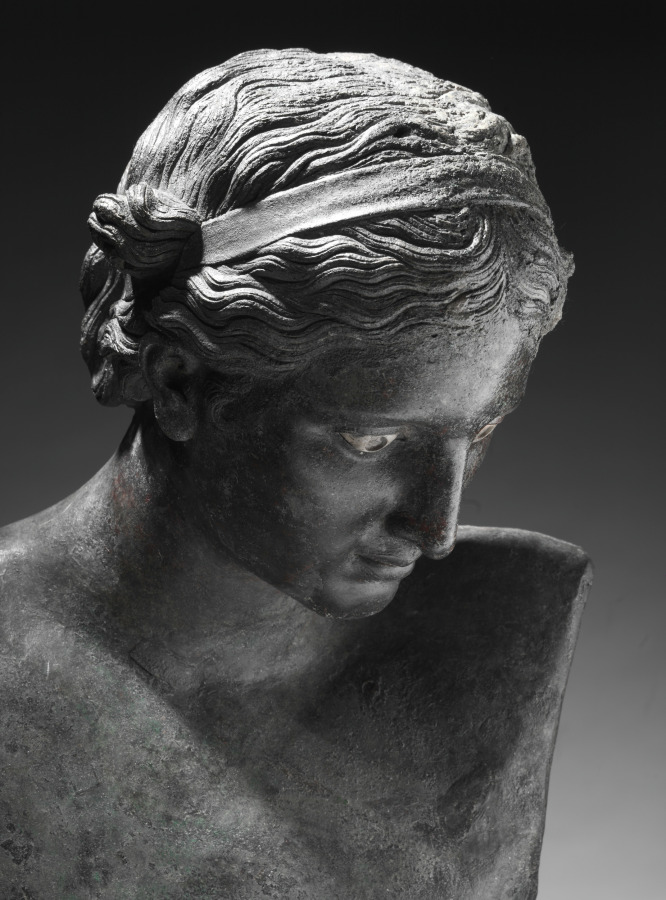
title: The Cleveland Apollo: Apollo Sauroktonos (Lizard-Slayer) or Apollo the Python-Slayer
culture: Greece, Athens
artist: attributed to Praxiteles (Greek, Athenian, c. 400–330 BCE)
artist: or Follower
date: c. 350–200 BCE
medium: bronze, copper and stone inlay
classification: Sculpture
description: The Cleveland Apollo was cast in multiple sections using the indirect lost-wax technique. First, molds were taken from a working model (now no longer known or preserved), which was then reproduced in hollow wax sections, each filled with a clay core. After details were added to the wax models, each was encased in clay. Then, the wax was heated, melted out, and replaced by molten bronze. Once cooled, the hollow bronze sections were fused together and finished, patching flaws and adding inlays and other details. Since the initial model was retained, it could be reused, allowing ancient sculptors to create multiples and variations of favorite works. Thus, remarkably, the Cleveland Apollo may once have been one of several such works. The consistently thin walls of the Cleveland Apollo (mostly 5-6 mm thick), together with the nearly invisible joins between most cast sections, show that it was created by highly skilled sculptors and foundry workers. Close looking reveals several noteworthy features. First, ovals atop the right foot mark a fusion weld, where molten bronze pooled to join separately cast sections. Second, small rectangular bronze patches cover parts of the surface (especially the right hip), each carefully cut and then hammered into place over holes or other casting defects. Inlaid lips, nipples, and eyes (the right ancient stone, the left now a modern replacement) added to the lifelike appearance of the sculpture, contrasting with the once bronze-colored skin. Finally, radiography helps to illuminate hidden features, such as the cast edge of the neck of Apollo.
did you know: Ovals across the top of the right foot show a clear join between separately cast sections.